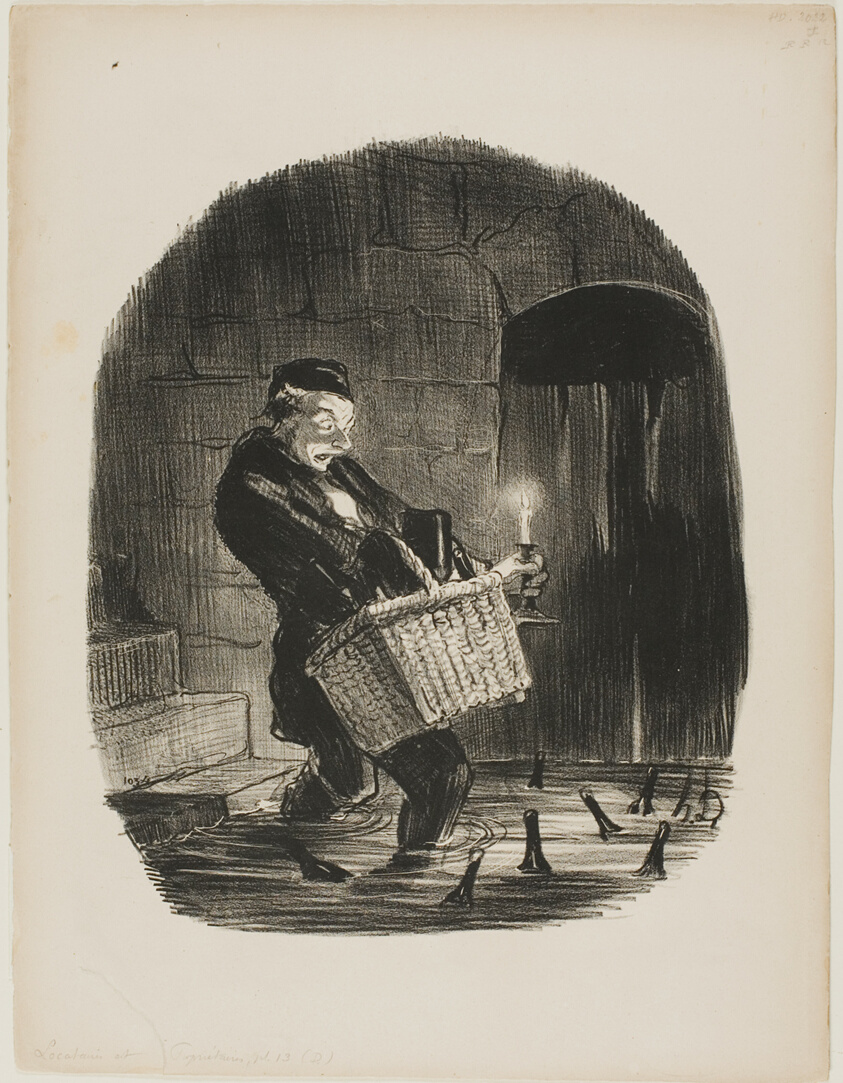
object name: Print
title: It is Inconvenient to Rent an Apartment Close to the River, plate 13 from Locataires et Propriétaires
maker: Honoré Victorin Daumier (French, 1808-1879); printed by Aubert & Cie. (French, active 19th century); later published in Le Charivari (French, 1832-1915)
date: 1847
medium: Lithograph in black on buff wove paper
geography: France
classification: lithograph; print; prints and drawing